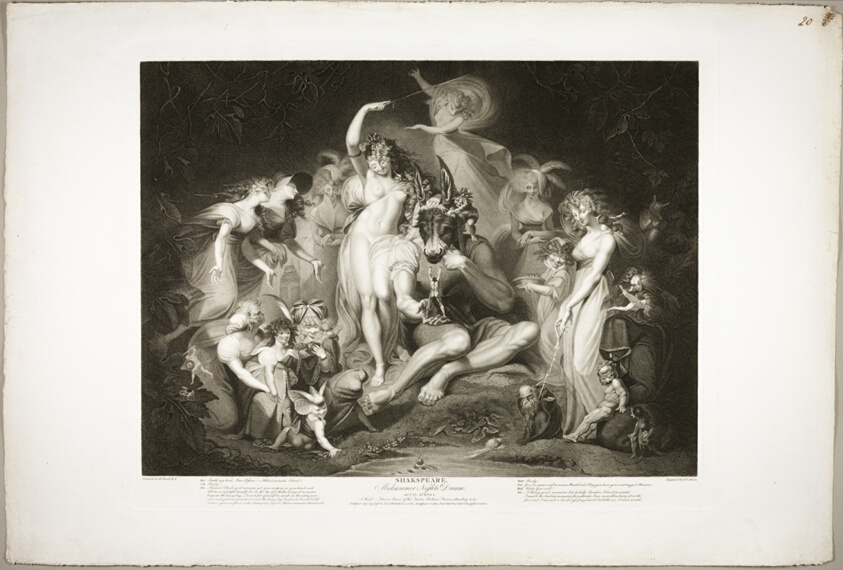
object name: Print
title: Titania and Bottom with the Ass's Head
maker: Jean Pierre Simon (British, born before 1750-c. 1810); after Henry Fuseli (Swiss, active in England, 1741-1825); published by John Boydell (English, 1719-1804); authored by William Shakespeare (English, 1564-1616)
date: 1796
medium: Etching and stipple on ivory wove paper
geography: England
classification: engraving; print; prints and drawing